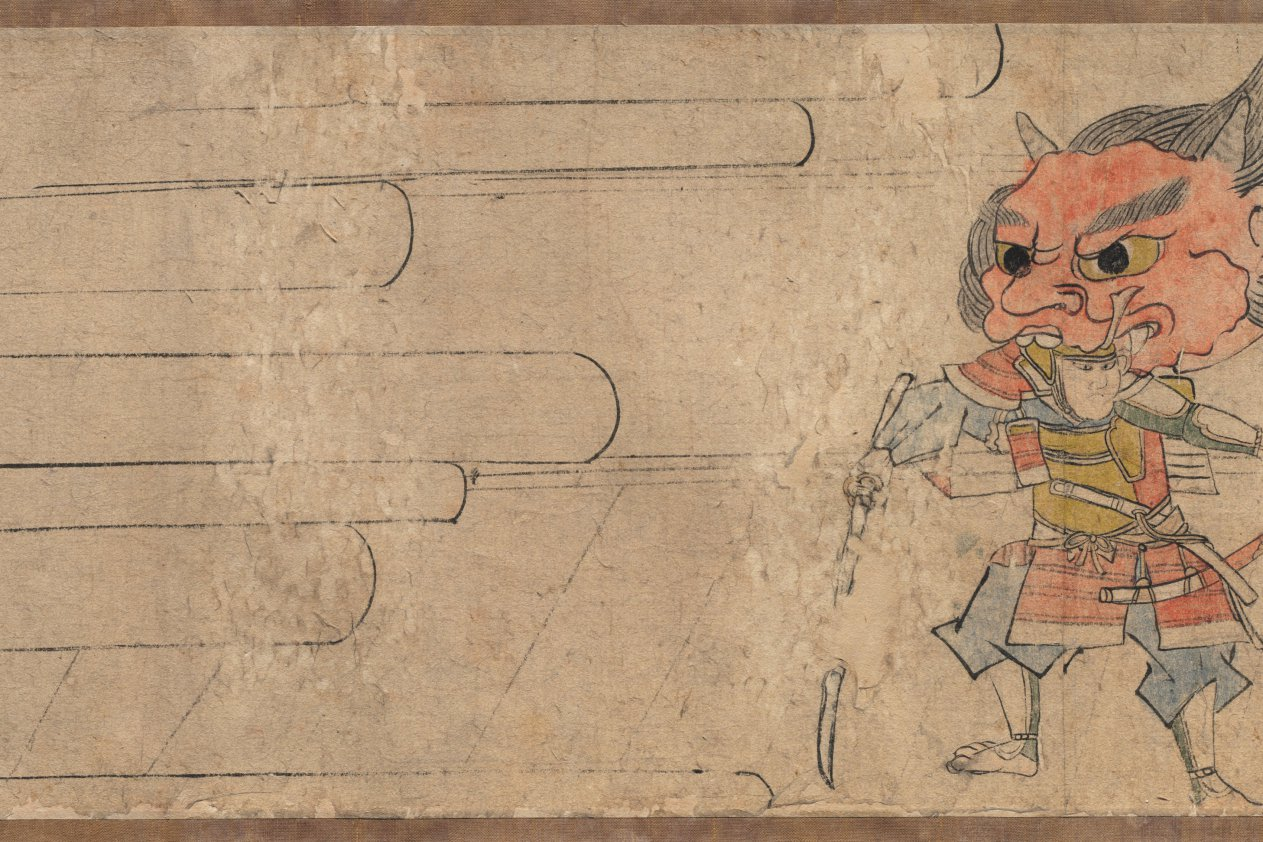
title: Oeyama Engi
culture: Japan, Edo period (1615–1868)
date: 1615–1868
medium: one of a pair of handscrolls; ink and color on paper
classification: Painting